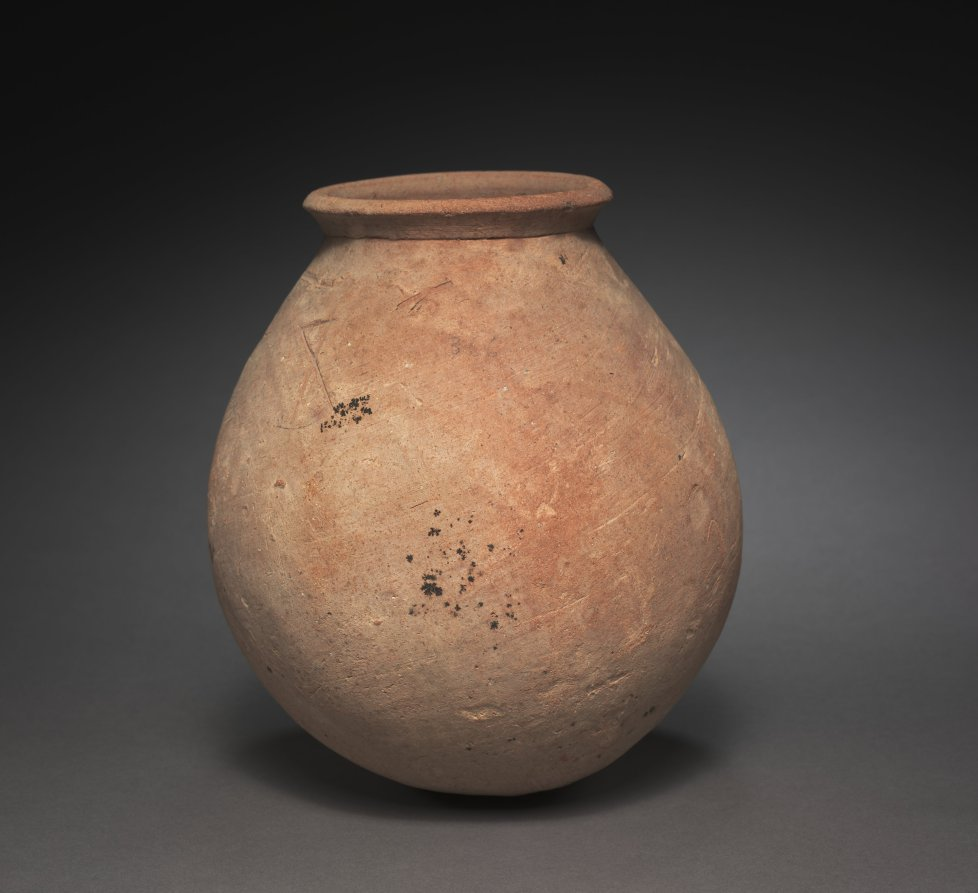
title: Water Jar (Globular Jar)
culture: Egypt, Haraga, cemetery S, tomb 366, excavated in 1914, Middle Kingdom (2040–1648 BCE), Dynasty 12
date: 1980–1801 BCE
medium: marl clay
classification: Vessels